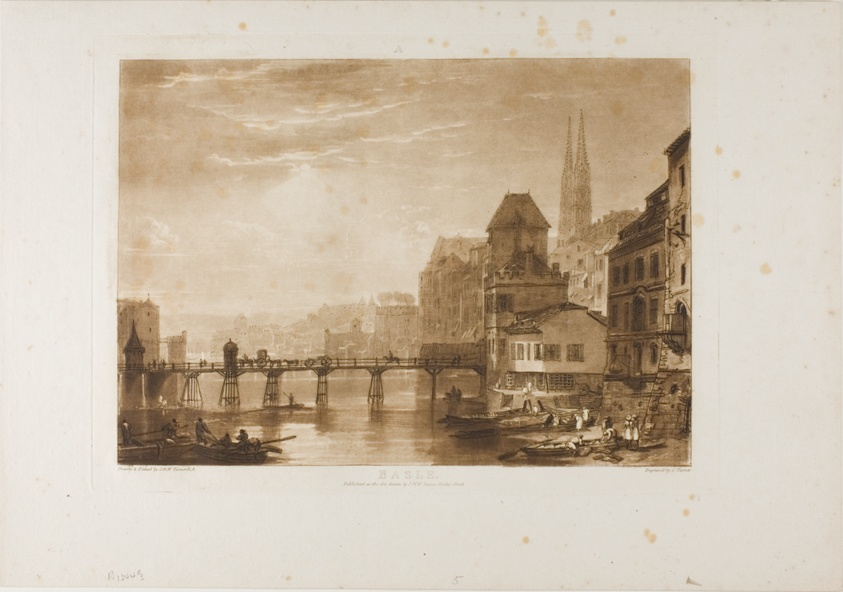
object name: Print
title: Basle, plate 5 from Liber Studiorum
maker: Joseph Mallord William Turner (English, 1775-1851); Engraved by Charles Turner (English, 1773-1857)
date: published 1807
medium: Etching and engraving in brown on ivory laid paper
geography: England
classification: etching; print; prints and drawing